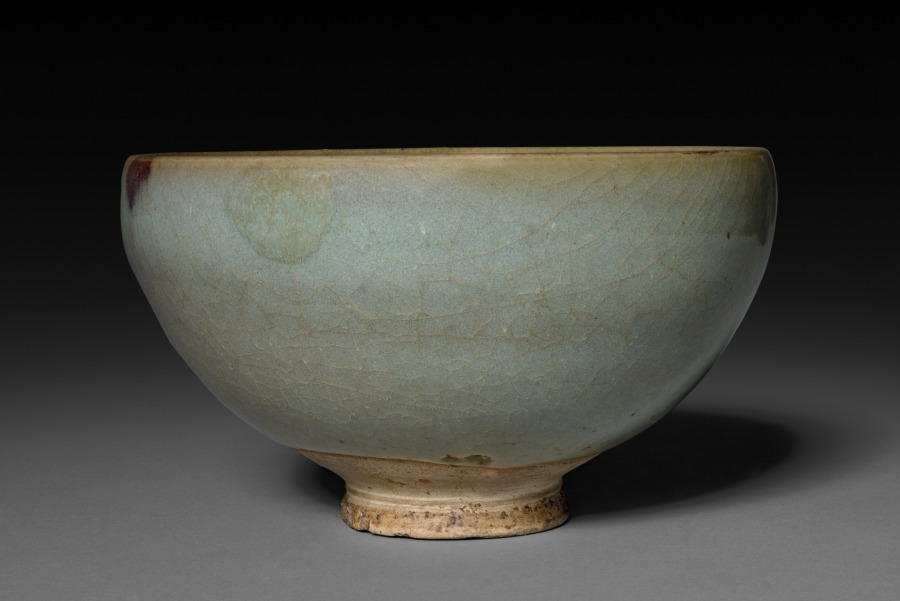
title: Bowl: Jun ware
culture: Northern China, Jin dynasty (1115-1234) - Yuan dynasty (1271-1368)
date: 13th - 14th century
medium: glazed buff stoneware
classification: Ceramic